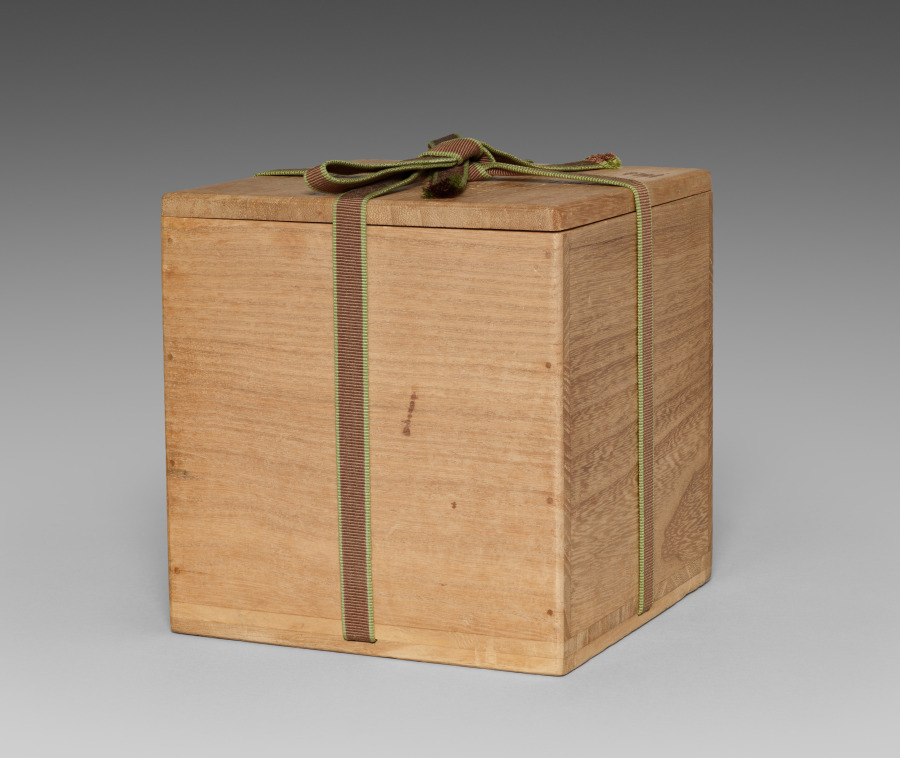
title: Celadon Cup with Molded Lotus Petal Design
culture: Korea, Goryeo dynasty (918–1392)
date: 1100s–1200s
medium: Celadon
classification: Ceramic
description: Celadon wares intended for everyday use—such as this dish—were among the most common burial objects placed in tombs during the Goryeo period (918–1392). Furnishing tombs with elaborate assemblages of objects was believed to honor the deceased and provide comfort in the afterlife. This dish, featuring the lotus petal motif, was likely a cherished possession that accompanied its owner to their final resting place.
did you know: The outer wall of this teacup is decorated with the image of lotus flower petal, a symbol of purity and salvation.